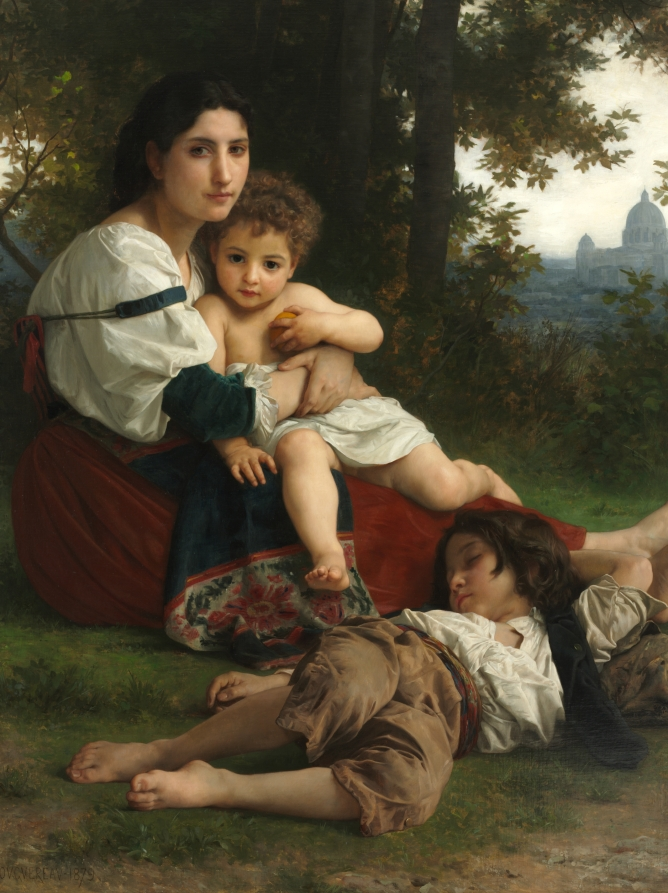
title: Rest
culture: France, 19th century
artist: William Adolphe Bouguereau (French, 1825–1905)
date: 1879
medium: oil on fabric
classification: Painting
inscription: Signed lower left: W. Bouguereau 1879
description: One of the most celebrated academic painters of his time, Bouguereau underscores the moral virtues of the Italian peasants in this painting by depicting the dome of St. Peter's in the distance. The idealized figures and their triangular grouping recall the Holy Family paintings by Renaissance master Raphael 400 years earlier. The painting was purchased directly from the artist by Cleveland banker and philanthropist Hinman B. Hurlbut in July 1879.